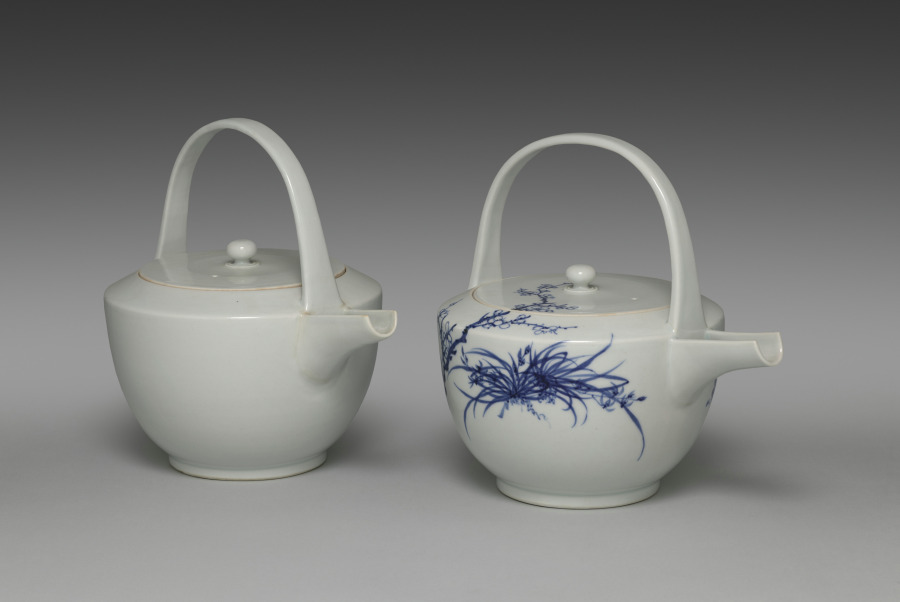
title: Sake Pourer with Chrysanthemum, Orchid, and Plum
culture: Japan, Meiji period (1868–1912)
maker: Seifū Yohei III (Japanese, 1851–1914)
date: c. 1887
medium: Porcelain with underglaze blue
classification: Ceramic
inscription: Artist's signature in underglaze blue on the base.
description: Seifū Yohei II and his successor, Seifū Yohei III, trained in ink painting. Their brush skills are seen in their underglaze cobalt blue designs. Orchid, bamboo, chrysanthemum, and plum, appearing on Yohei III’s sake pourer, are known as the Four Gentlemen. They symbolize the virtues of humility, integrity, endurance, and perseverance.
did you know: This sake pourer is decorated with the Chinese theme of the Four Nobles, in which the qualities of a good person are represented by plant.